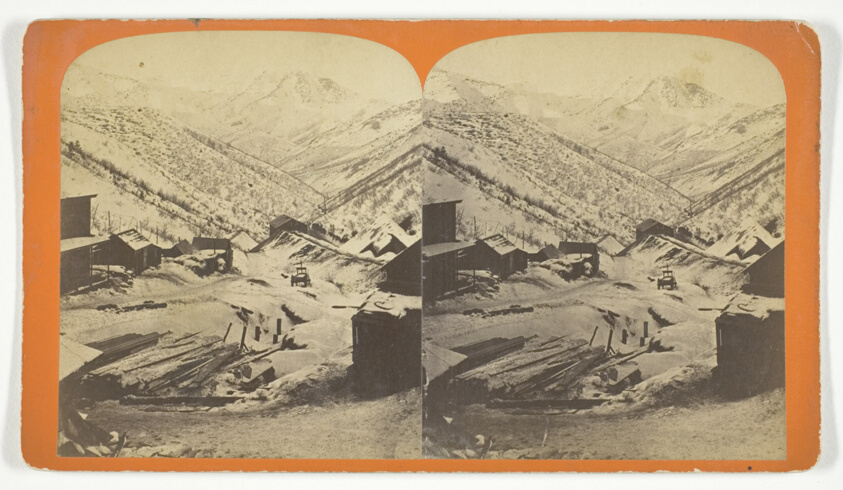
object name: Photograph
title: Bingham Canon, Telegraph Mine, near Salt Lake Utah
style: 19th century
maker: C. W. Carter (American, 1832–1918)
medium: Albumen print, stereo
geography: United States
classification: stereograph (albumen); albumen silver print; photographic process; photography; photograph